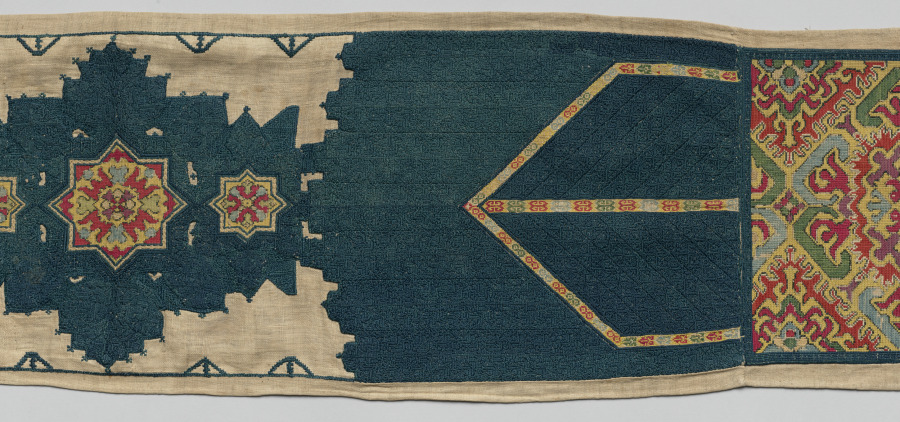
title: Furnishing textile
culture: Africa, North Africa, Morocco, Chefchaouen, Moroccan embroiderer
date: 1600s–1700s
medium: silk on linen tabby ground, embroidery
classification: Embroidery